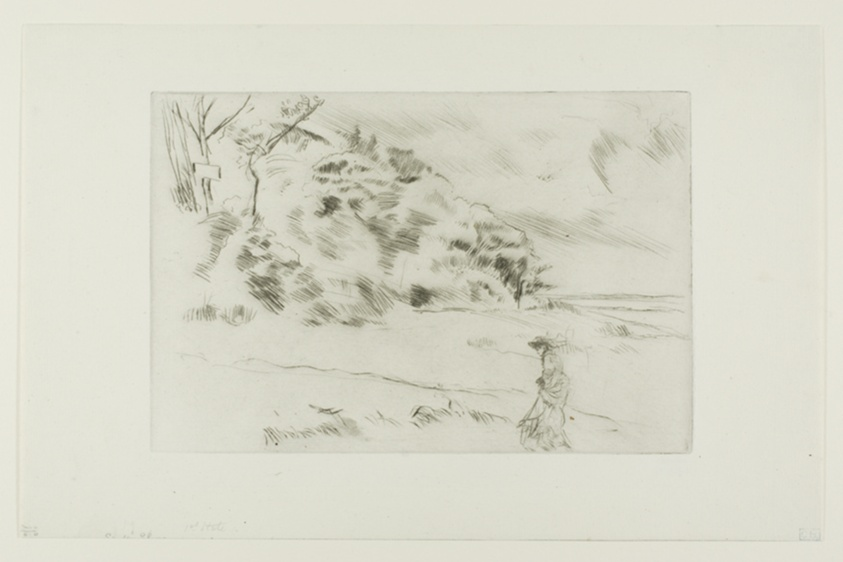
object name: Print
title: Speke Shore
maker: James McNeill Whistler (American, 1834-1903)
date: 1875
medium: Drypoint in black ink on off-white laid paper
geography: United States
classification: drypoint; print; prints and drawing; paper